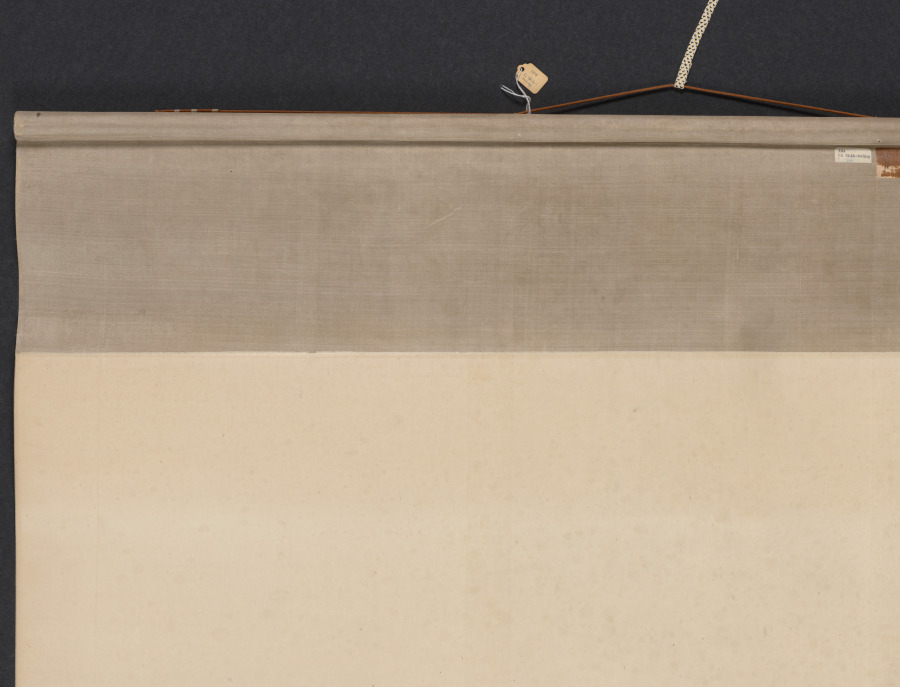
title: Old Trees by a Cool Spring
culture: China, Yuan dynasty (1271-1368)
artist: Li Shixing (Chinese, 1283–1328)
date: 1326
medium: hanging scroll; ink on silk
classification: Painting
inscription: 泰定丙寅年冬十二月薊丘李士行遵道作。[印] 李士行印; 李氏遵道; 遊戲翰墨.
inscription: 薊丘李侯能畫松，蟠根錯節騰蛟龍。 枯梢削鐵歲月古，細葉當風紫翠重。 昔人曾入子固夢，此株豈為秦官封。 畢宏韋偃偕已矣，請公放筆吾將從。 華溪九十翁沈夢麟書 蘊中上人題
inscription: [印] 明善堂所見書畫印記; [印] 怡親王寶